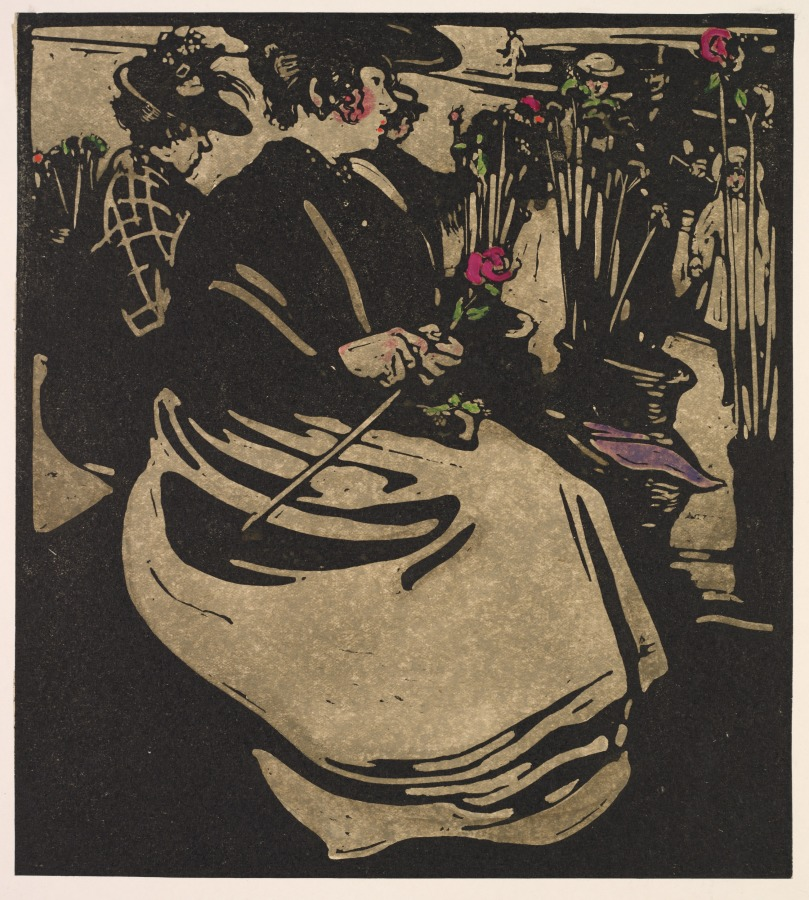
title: London Types: Flower Girl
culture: England, 19th century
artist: William Nicholson (British, 1872–1949)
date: 1898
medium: woodcut hand-colored with watercolor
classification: Print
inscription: lower left margin, in black ink: William Nicholson - 1898 -